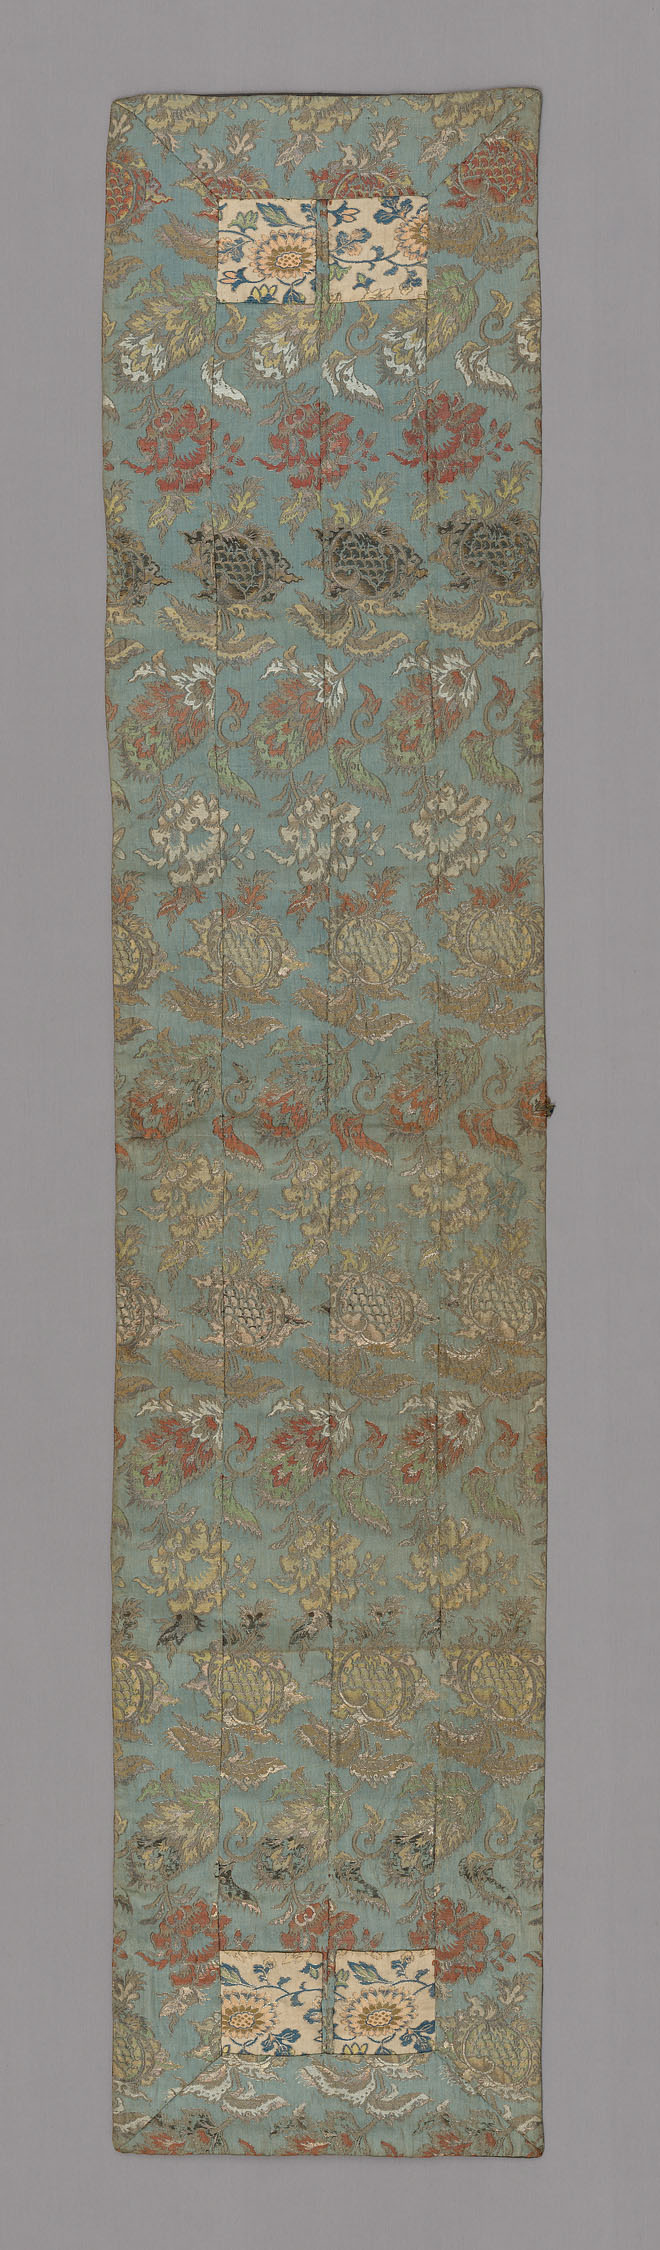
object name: Textile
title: Ôhi (Stole)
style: late edo, Japanism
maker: Japan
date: Edo period (1615–1868), 1775/1825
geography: Japan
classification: textile; weaving